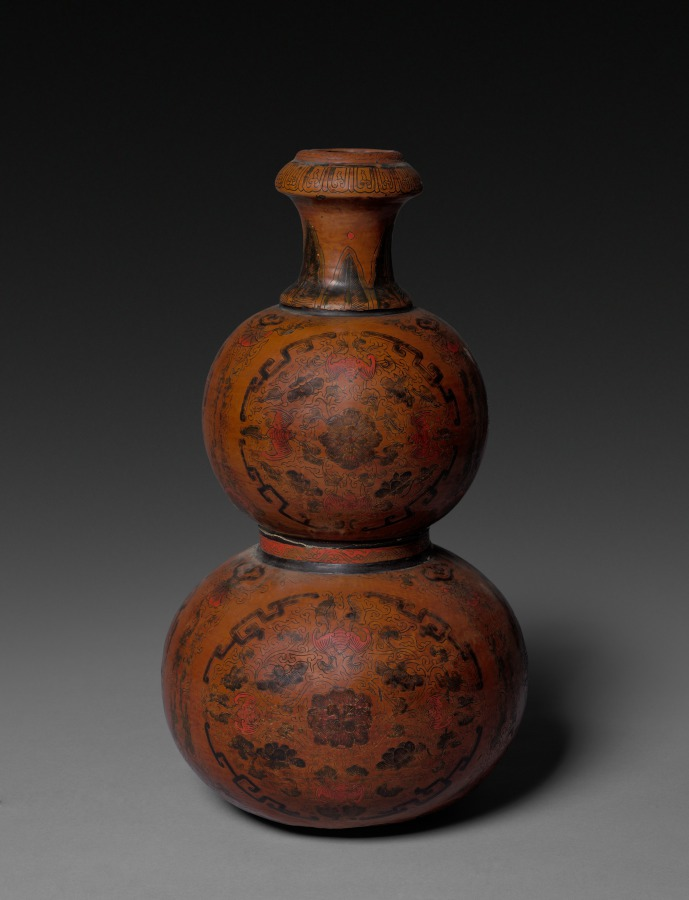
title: Vase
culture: China, Qing dynasty (1644-1911)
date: 1644–1911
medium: lacquered wood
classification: Lacquer